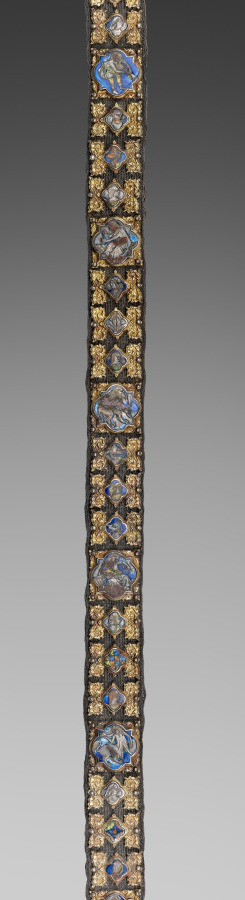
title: Belt for a Lady's Dress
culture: Italy, Siena(?)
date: c. 1375–1400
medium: basse-taille enamel and gilding on silver, silver thread, gilt-silver buckle, cast and chased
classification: Jewelry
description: Because of its extraordinary richness, this belt (also known as a girdle) was both an ornament for the body and an object of great personal luxury. Almost eight feet in length, belts like this were at the height of fashion for both men and women. After being passed around the waist and through the buckle, one end of the belt would fall to the hem of the garment. The belt's many colorful enamel plaques are worked in translucent enamel over decoration engraved into the silver beneath (an enameler's technique known as basse-taille). Within the plaques and cast into the buckle are scenes of courtly love, musicians, and fantastic animals. A large number of translucent enamels were made for secular objects during the late Middle Ages for use on jewelry, cups, garment clasps, and similar objects. This belt is a rare survival among these now scarce objects.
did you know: Look closely at the tiny scenes of courtly love on the plaques that adorn this belt. Given their size, these scenes were designed for the enjoyment of the woman who wore this belt over a sumptuous dress rather than an admirer from a distance.